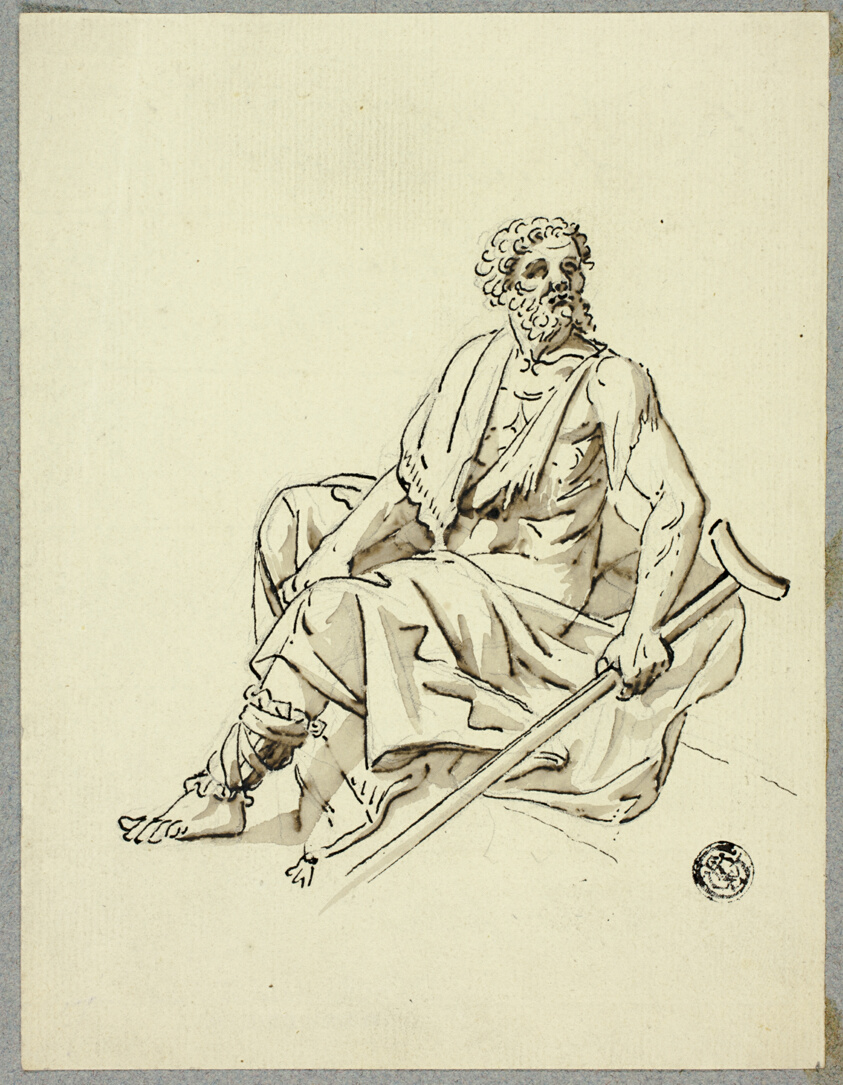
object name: Drawing and Watercolor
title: Seated Old Man with Crutch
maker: Hans Heinrich Meyer (Swiss, 1760-1832)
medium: Pen and black ink, with brush and brown wash, on cream laid paper, tipped on blue laid paper with red fibers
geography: Switzerland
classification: pen and ink drawings; drawings (visual works); prints and drawing